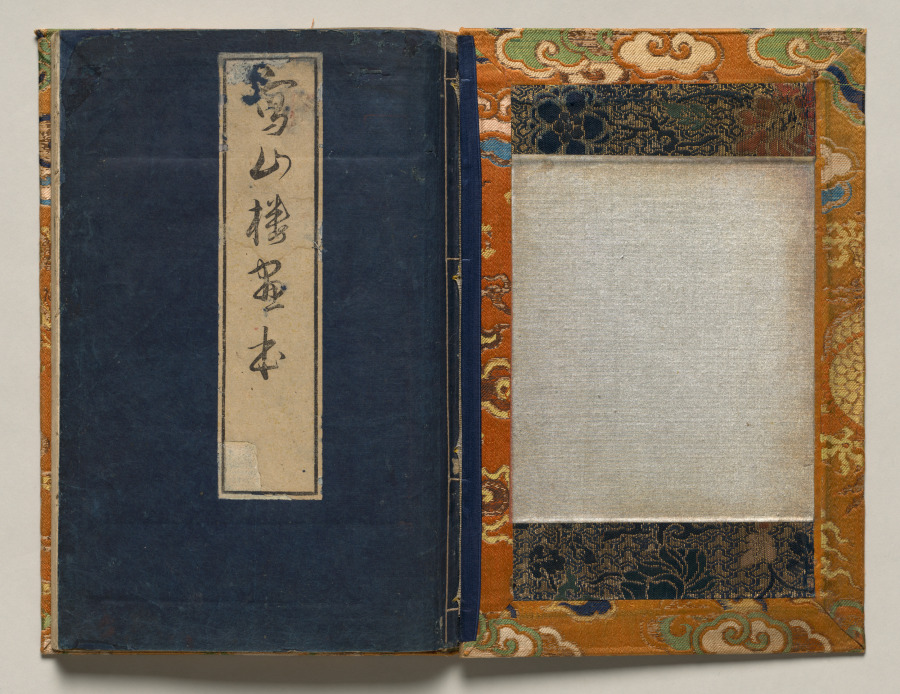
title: Textile Cover for Shazanrō Picture Book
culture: Japan, Edo period (1615–1868)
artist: Tani Bunchō (Japanese, 1763–1841)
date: 1816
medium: Woodblock-printed book; ink and color on paper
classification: Bound Volume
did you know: Shazanrō was one of Tani Bunchō's style names.